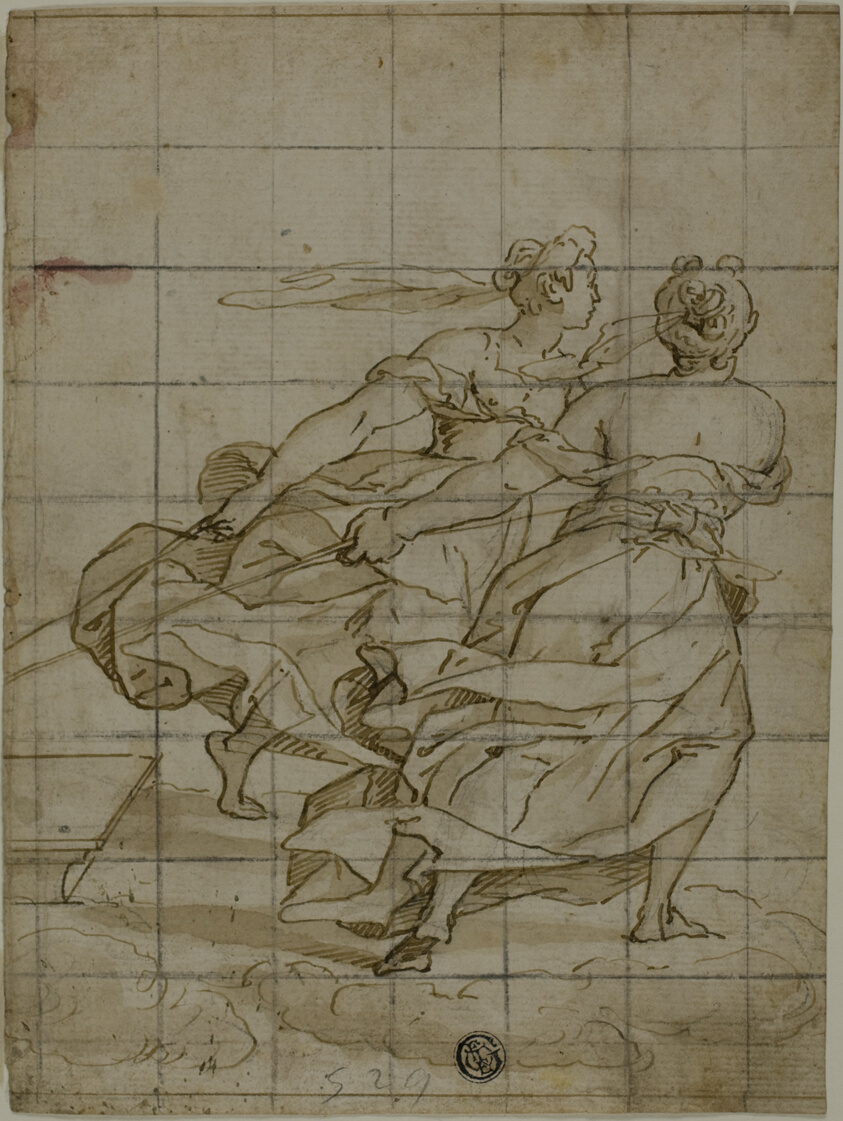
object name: Drawing and Watercolor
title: Two Women on Clouds, Pulling a Load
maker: Circle of Bernardo Castello (Italian,; Lazzaro Tavarone (Italian, 1556-1641)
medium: Pen and brown ink with brush and brown wash, with traces of black chalk, on ivory laid paper, squared in black chalk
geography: Italy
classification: ink with wash; drawings (visual works); prints and drawing